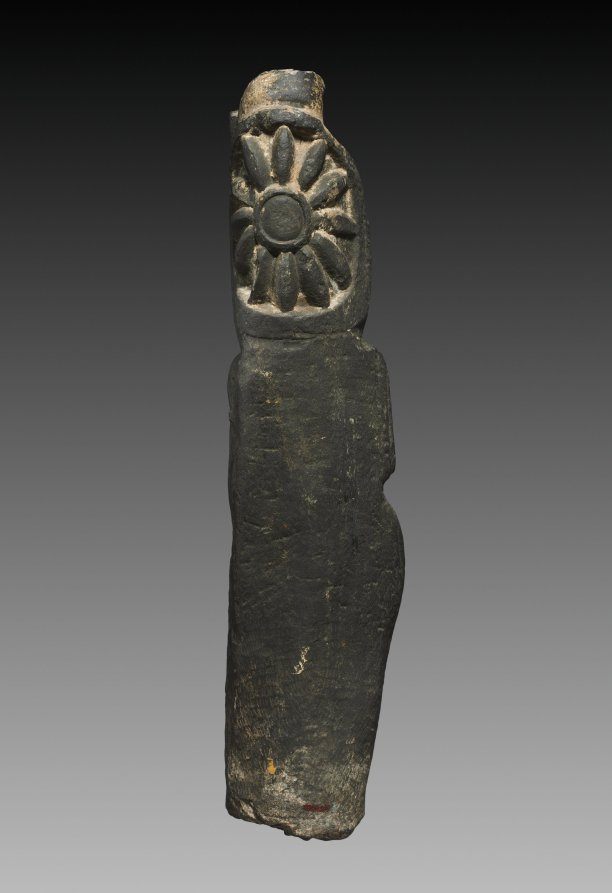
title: Personification of the Discus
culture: Northeastern India, Bihar, Aphsad, early Pala period, 7th Century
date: 670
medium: chlorite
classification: Sculpture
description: Vishnu's main weapon is the discus, or chakra in Sanskrit. Vishnu's chakra is a wheel that is a metaphor for true knowledge, which he uses in mythic battles to slice demons who stand for ignorance and self-centered arrogance. Iconic images of Vishnu show him as four-armed, with a discus in one hand; sometimes the discus is personified. This personification, with the chakra behind his head, has broken away from the main image of Vishnu. Stylistically this sculpture retains memories of the Gupta styles, with the lush ringlets of hair curling from a central part, the relatively simple adornments, and the soft contours of the body. The exaggerated facial expression and figural proportions indicate a transition to a later period.